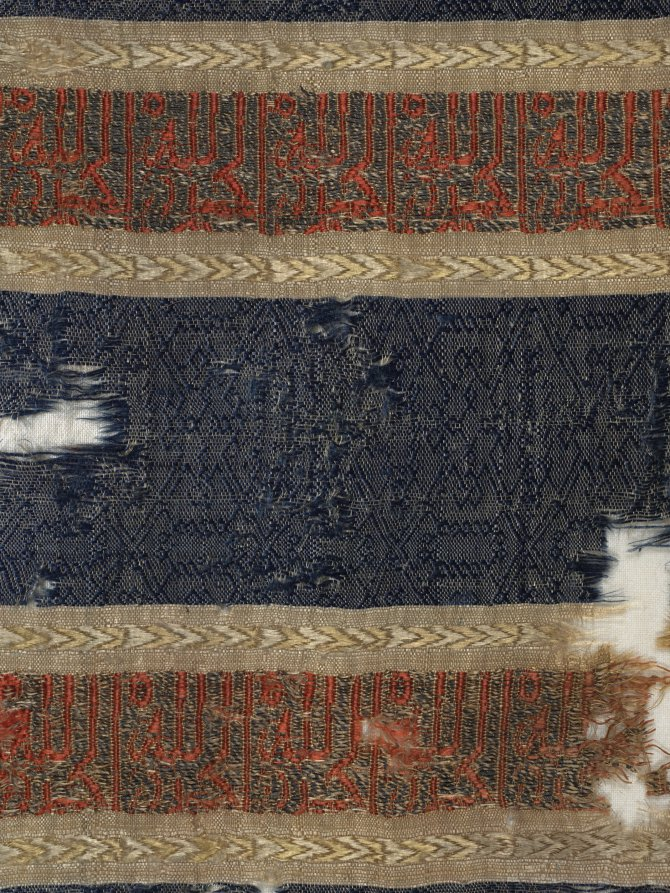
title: Silk fragment with decorated and inscribed bands, from the tomb of Don Felipe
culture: Spain, probably Almeria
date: 1200s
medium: Silk: plain weave with supplementary weft, silk and silver thread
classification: Textile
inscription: band of Naskhi inscription of red on silver which reads: "Praise be to God."